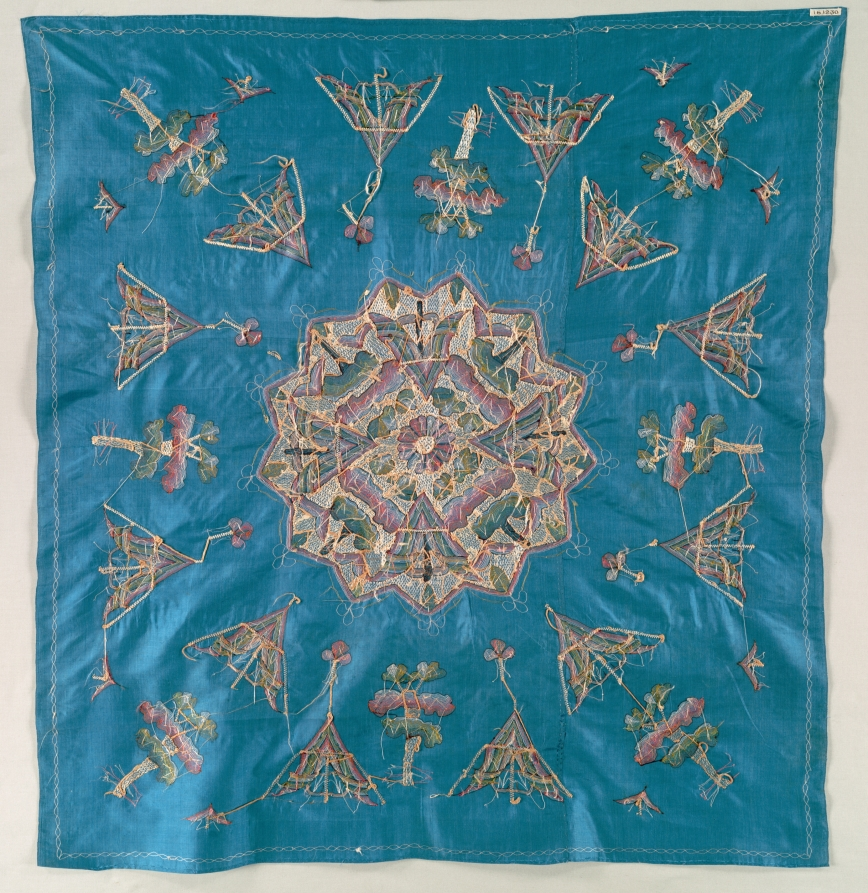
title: Embroidered Table Cover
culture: Turkey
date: 1700s–1800s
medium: Silk and metallic threads on silk tabby ground; embroidery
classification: Embroidery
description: This embroidered table cover has a central medallion containing geometric motifs, which resemble closely clustered tents and trees. This is surrounded on all sides by individual tents and trees.